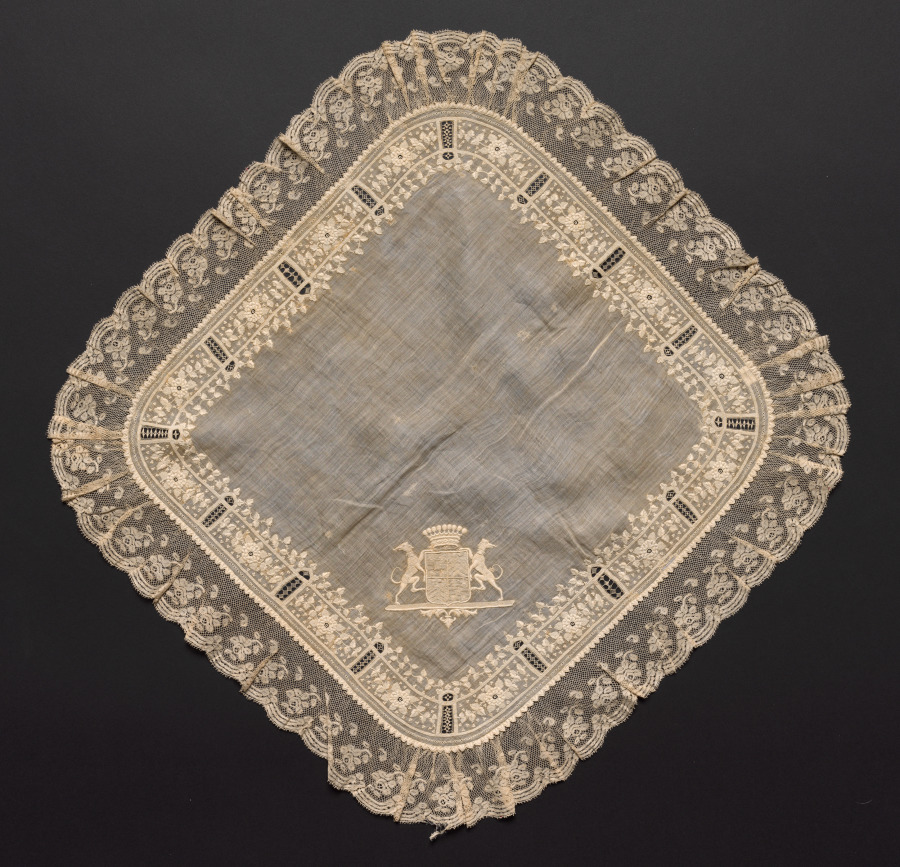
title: Lace Handkerchief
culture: France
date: 1800–1820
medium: Plain weave linen center: bobbin lace edging and embroidery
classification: Embroidery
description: There is a coat of arms embroidered in one corner of this lace handkerchief.